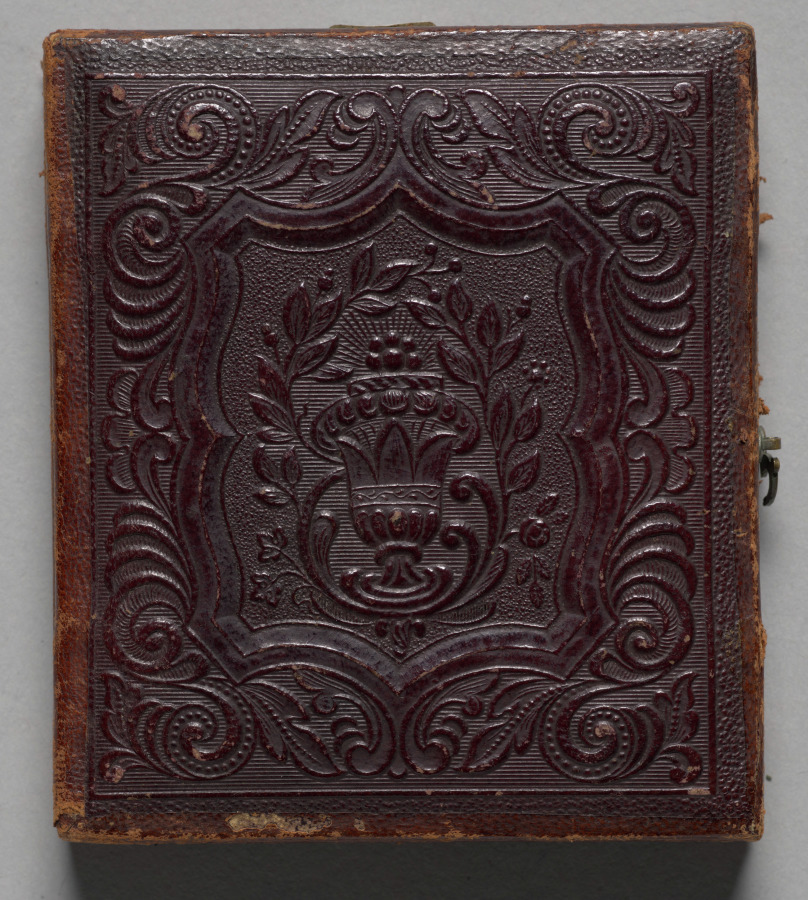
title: Mother with son with blind right eye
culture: America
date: c. 1855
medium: daguerreotype, sixth plate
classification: Photograph